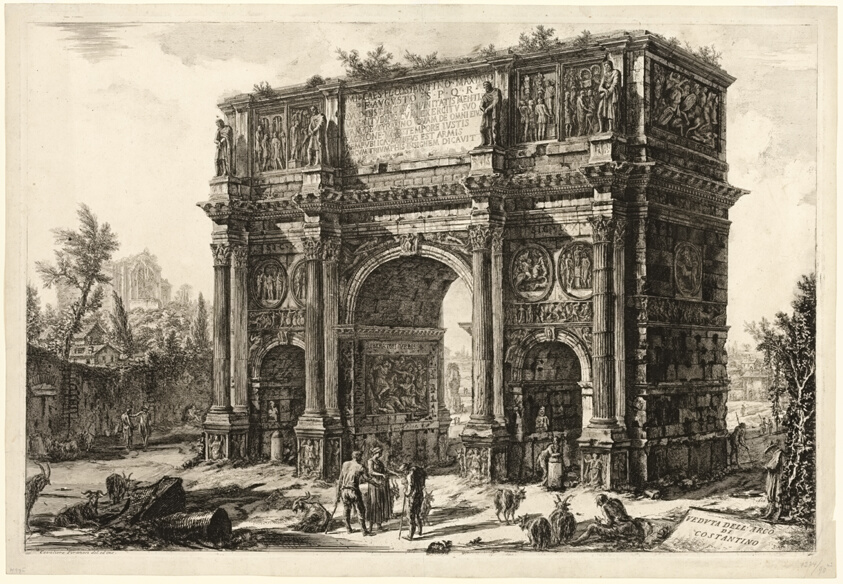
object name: Print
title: View of the Arch of Constantine, from Views of Rome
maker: Giovanni Battista Piranesi (Italian, 1720-1778); published by Francesco (Italian, 1758-1810) and Pietro Piranesi (Italian, born 1758/9)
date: 1771, published 1800–07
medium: Etching on heavy ivory laid paper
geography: Italy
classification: etching; print; prints and drawing